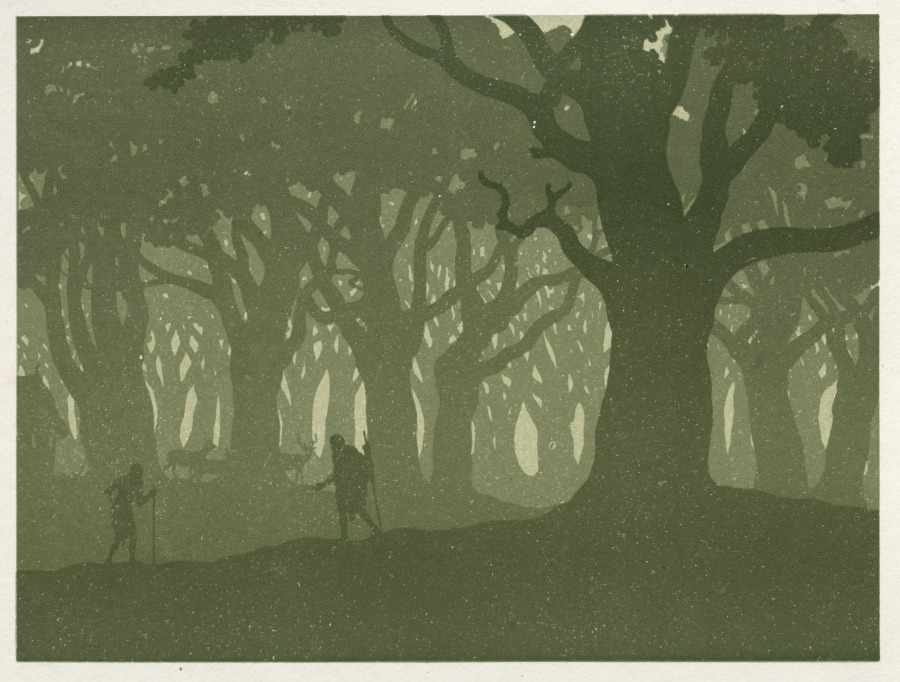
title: The Wandering Jew: Cover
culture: France, 19th century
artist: Henri Rivière (French, 1864–1951)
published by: Verneau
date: 1896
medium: color lithograph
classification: Portfolio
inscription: title page is signed, in blue crayon: Henri Rivière